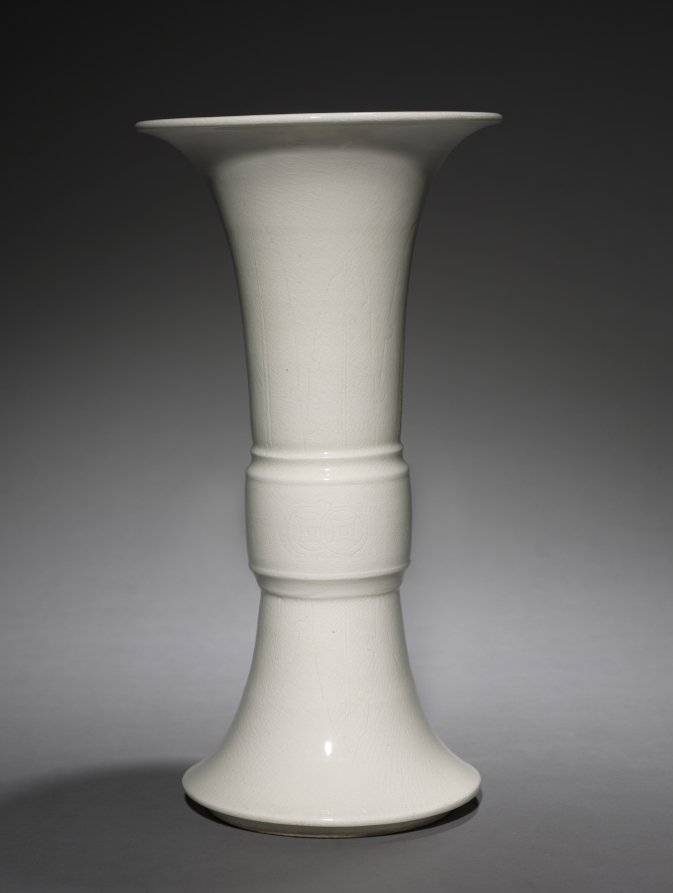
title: Beaker Vase: Zun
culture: China, Qing dynasty (1644-1911), Kangxi reign (1661-1722)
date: 1661–1722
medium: porcelain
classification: Ceramic